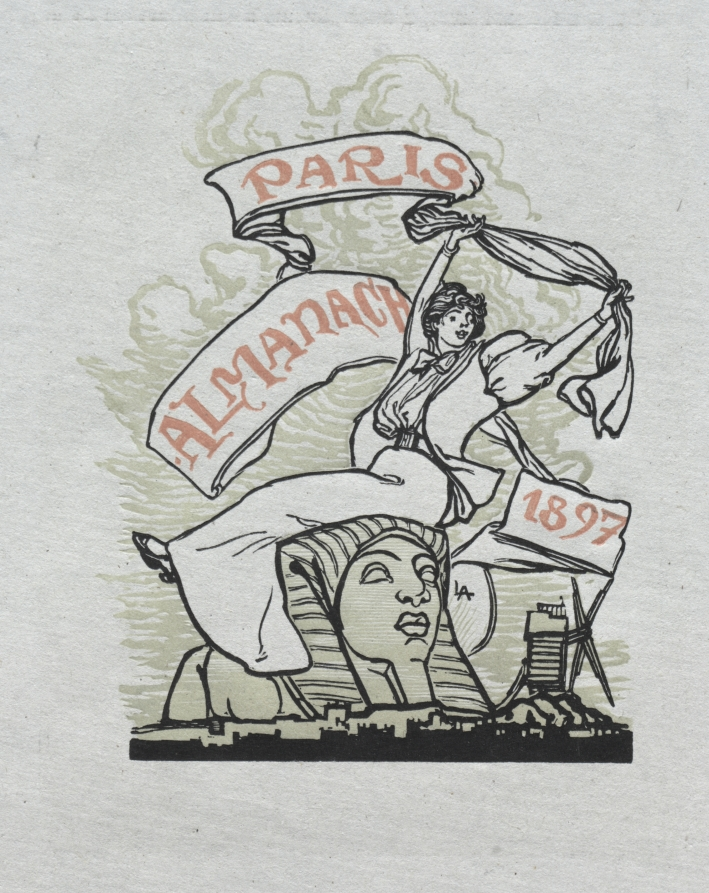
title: Paris Almanac, 1897: Back Cover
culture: France, late 19th Century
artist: Auguste Louis Lepère (French, 1849–1918)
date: 1897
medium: wood engraving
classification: Print